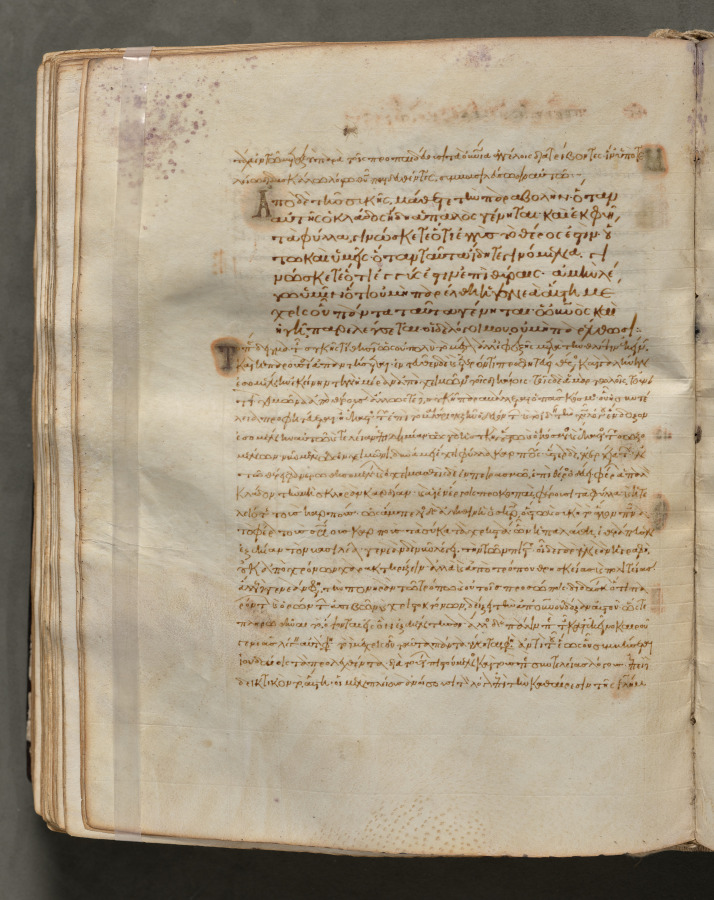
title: Text, folio 184 (verso), from a Gospel Book with Commentaries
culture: Byzantium, Constantinople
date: c. 1000–1100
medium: ink, tempera, and gold on vellum; leather binding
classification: Bound Volume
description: Each of the four gospels in this book opens on a page with brilliantly illuminated borders depicting the author of the text as well as birds-principally peacocks, symbols of the immortality of the soul-and fountains, representing the fountain of life and the salvation of the soul. This volume consists of 428 leaves with texts in Greek. Its level of sophistication suggests that it was probably written and decorated in a monastery in Constantinople.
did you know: Gospel Books were carried in procession through Byzantine churches.